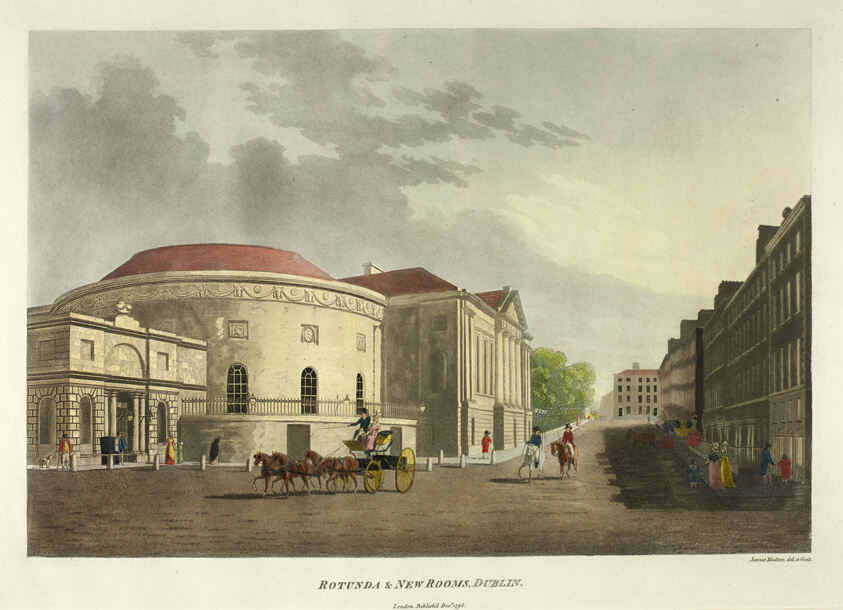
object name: Print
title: Rotunda and New Rooms - Dublin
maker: James Malton (English, 1761-1803)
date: published December 1975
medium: Hand-colored aquatint in black on ivory wove paper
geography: England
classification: aquatint; print; prints and drawing